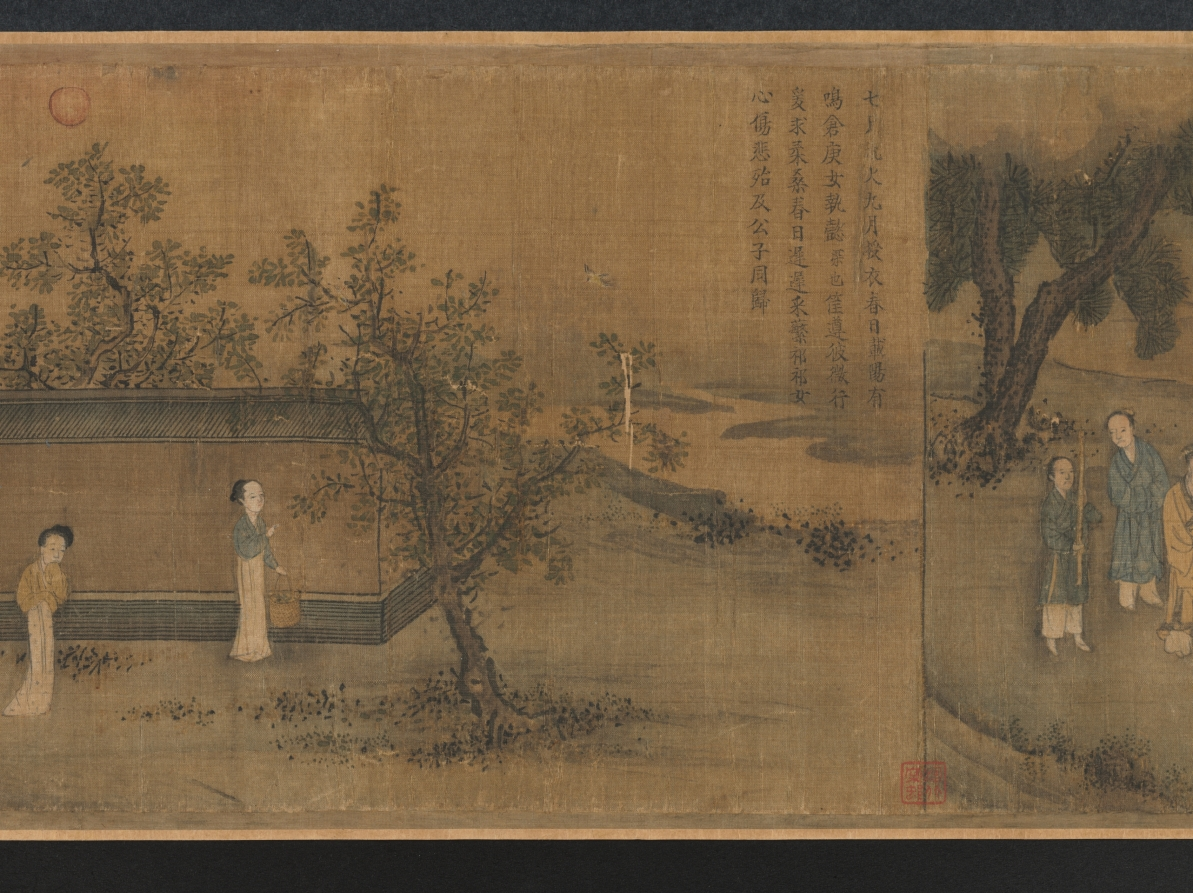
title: "Seventh Month" from the Odes of Bin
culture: China, Southern Song dynasty (1127-1279)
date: 1200s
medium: Handscroll; ink and color on silk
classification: Painting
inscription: Colophons: 1. [on the frontispiece] by the Qianlong emperor (dated 1741). 2. by Lu Wan (dated Zhengde dingchou, 1517). 2. by the Jiaqing emperor (dated 1807).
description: According to Confucian thought, the ruler looks after the well-being of his people which involves agricultural activities. Seventh Month from the ancient Odes of Bin in the Shijing (Book of Poetry) describes occupations throughout the year, including plowing, harvesting, hunting, making clothes, and observing rituals. The earliest illustrations of these Odes accompanied by text were commissioned by Southern Song emperor Gaozong (reigned 1127–1162). As the lower Yangzi delta had become the new seat of government, Gaozong had sets of these illustrations produced by court artists to revive the dynasty and convince the Confucian officialelite of his legitimacy to rule.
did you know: The Odes of Bin appears in the classic Shijing (Book of Poetry), an anthology of more than 300 poems, folk songs, and ceremonial hymns that were originally chanted to music.